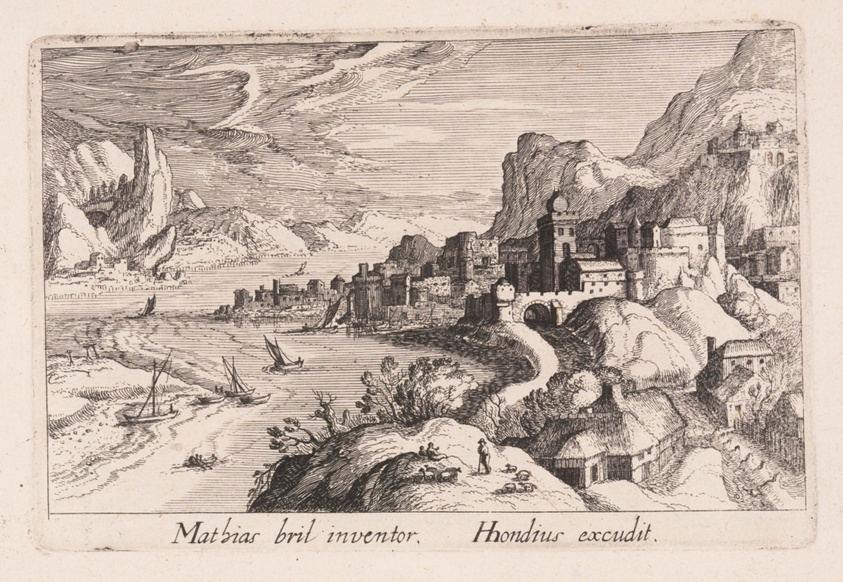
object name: Print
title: Alpine River Valley, from Topographia Variarum Regionum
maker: Simon Frisius (Dutch, c. 1580–1629); after Matthijs Bril (Flemish, 1550-1583)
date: 1614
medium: Etching on paper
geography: Netherlands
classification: etching; paper; print; prints and drawing